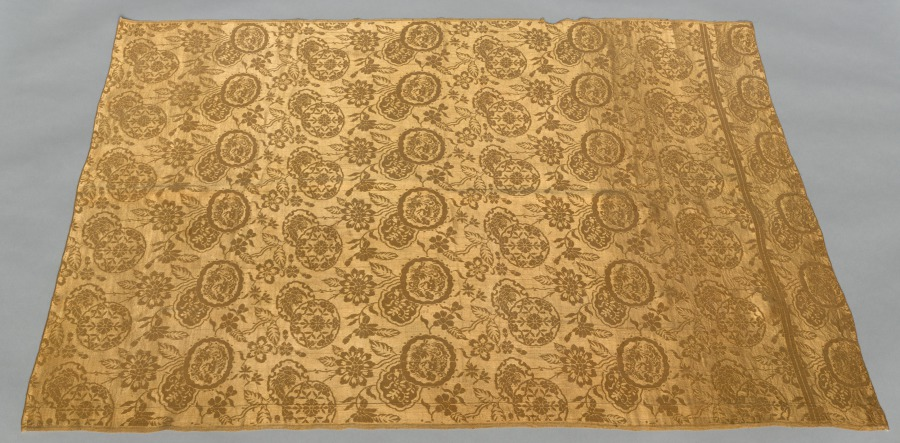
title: Fragment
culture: China, 19th century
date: 1800s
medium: silk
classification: Textile